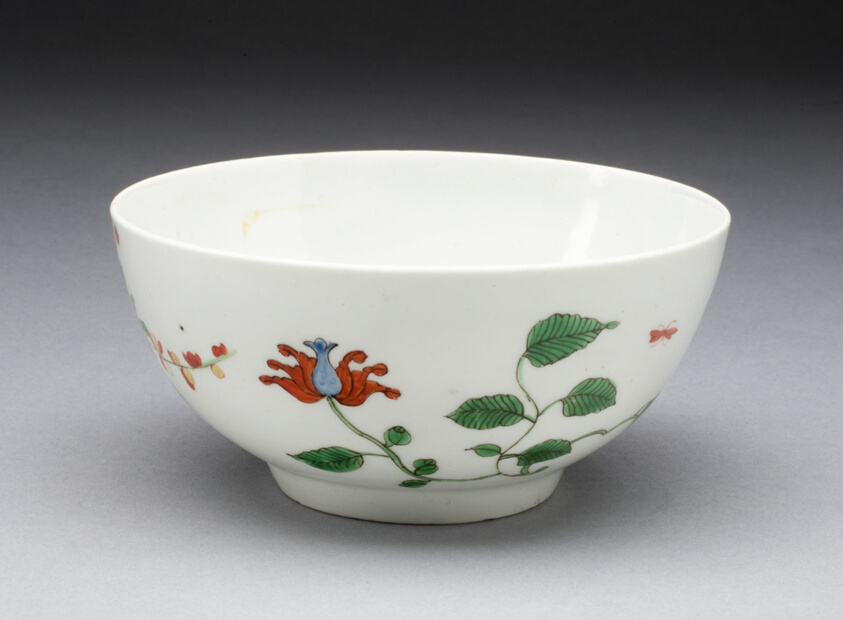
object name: Ceramics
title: Slop Bowl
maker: Worcester Porcelain Factory (Warmstry House Period, 1751–1783); Worcester, England, founded 1751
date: c. 1770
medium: Soft-paste porcelain with polychrome enamels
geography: Worcester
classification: slop bowl; tableware; teaware; ceramics; porcelain; european decorative arts